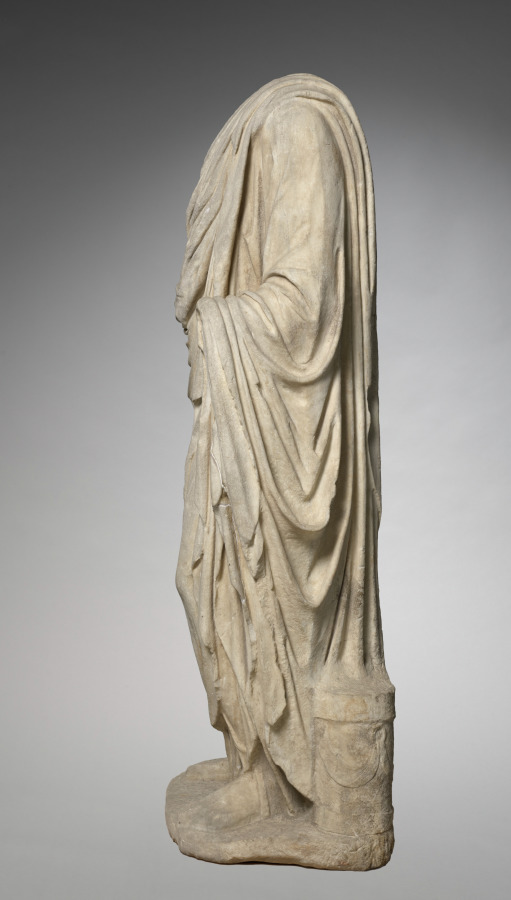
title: Togatus Figure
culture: Italy, Roman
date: 1–200 CE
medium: pentelic marble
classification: Sculpture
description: From 1929 until 1973, this toga-clad body was displayed with a portrait head of Vespasian (recarved from Nero) that did not originally belong to it. Several details indicate a mismatch: the surfaces and proportions differ, and the head projected awkwardly forward even after modern recarving of the neck to fit into the body cavity. Aspects of the toga also suggest that it was sculpted later than the head.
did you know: This body once included a separately made head and arms.